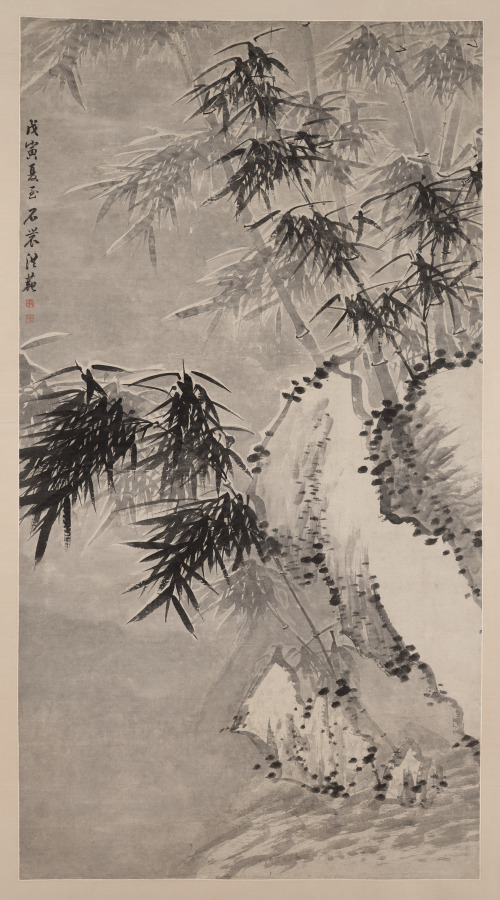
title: Bamboo in Snow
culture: China, Qing dynasty (1644–1911)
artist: Hong Fan (Chinese, active late 1700s–early 1800s)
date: 1818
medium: hanging scroll; ink on paper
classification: Painting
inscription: 戊寅夏至石農洪範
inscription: 洪範之印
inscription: 石農詩畫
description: Hong Fan’s bamboo stalks amidst rocky boulders bend gently forward. Light washes of ink suggest a misty, wintry atmosphere. Fan was inspired in style and concept by the poet, calligrapher and painter, Su Shi (1037-1101) who considered bamboo an ideal subject to express the calligraphic qualities of brushwork. Bamboo that bends, but does not break under the heavy snow, was also an image for the upright scholar who withstands adverse times.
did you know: Hong Fan’s bamboo stalks and rocky boulders fill the picture plane almost entirely and recede and fade in the background, suggesting the depth of a grove and a wintry, hazy atmosphere.